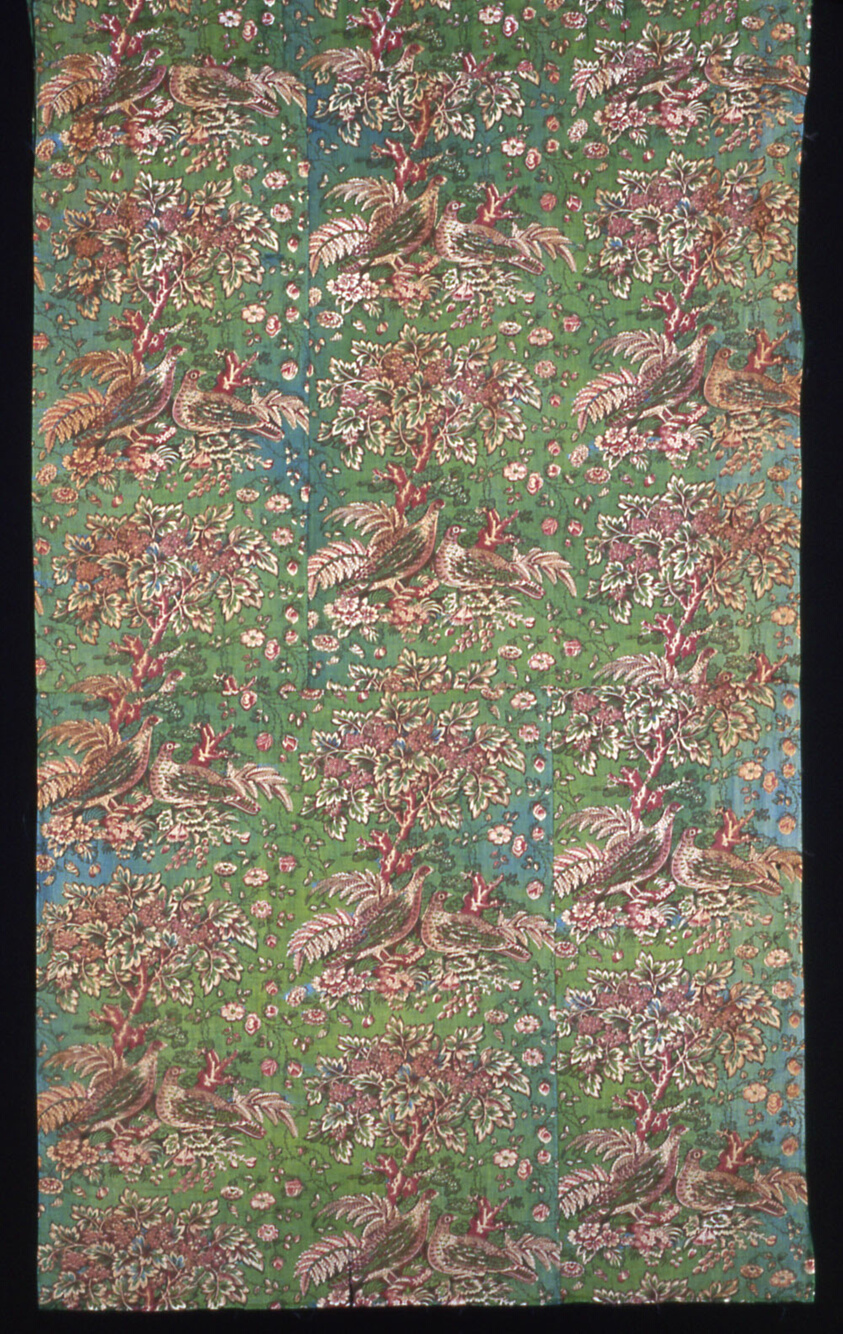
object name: Textile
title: Plum Trees and Pheasants (Furnishing Fabric)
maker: Printed at Bannister Hall Print Works (English, 1798-1893); England, Lancashire, Preston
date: c. 1830/40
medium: Cotton, plain weave; block printed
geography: England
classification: textile; weaving - printed; furnishing textile